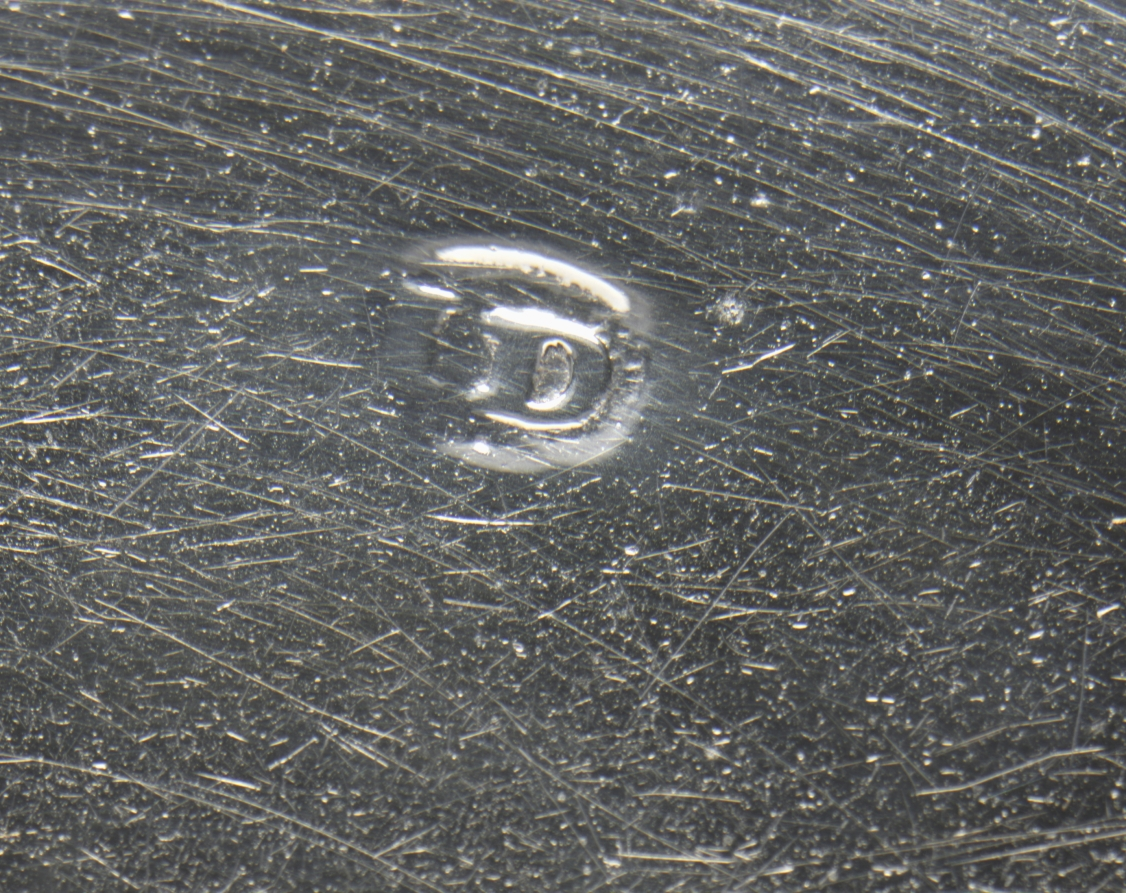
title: Footed Salver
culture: America, Massachusetts, Boston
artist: John Dixwell (American, 1680–1725)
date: 1710–20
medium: silver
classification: Silver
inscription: engraved, all in shaded block letters underneath salver: "B" over "N*D" opposite "E*S."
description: A serving tray used for one cup or glass.